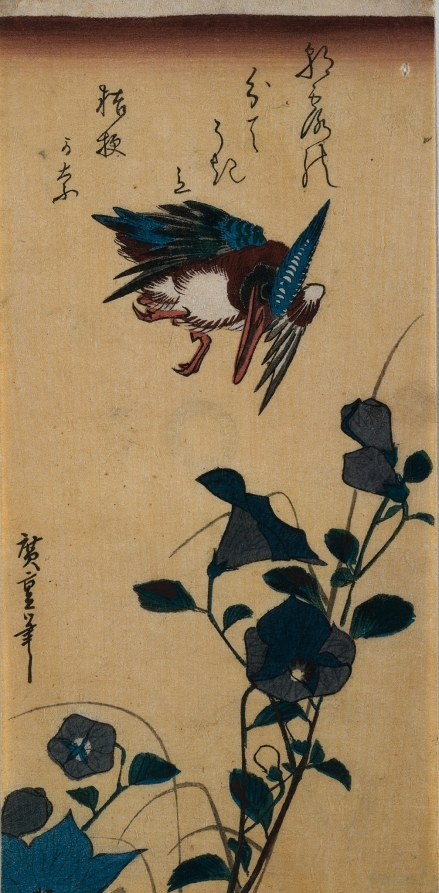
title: Kingfisher and Chinese Bellflowers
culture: Japan, Edo period (1615–1868)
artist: Utagawa Hiroshige (Japanese, 1797–1858)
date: early or mid-1830s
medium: color woodblock print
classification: Print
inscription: Signature: Hiroshige hitsu